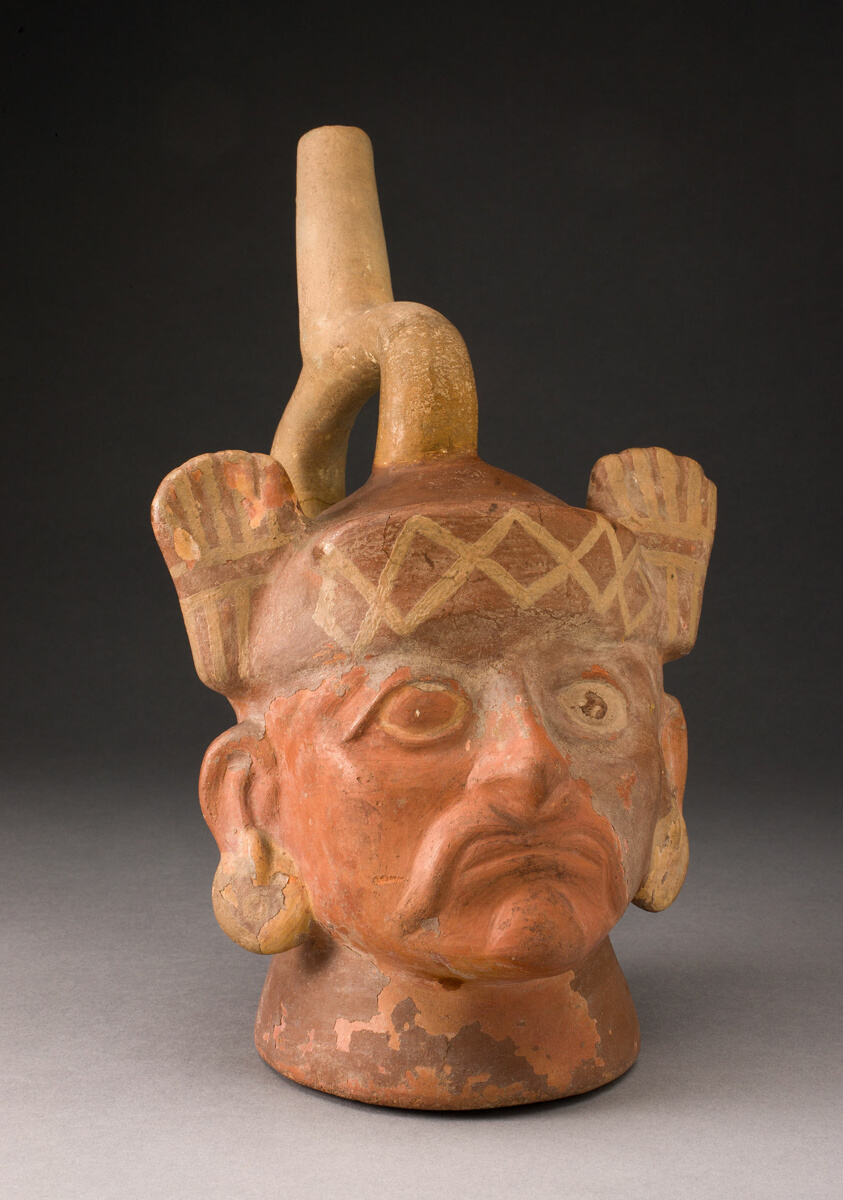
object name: Vessel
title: Portrait Vessel of a Ruler with Mustache and Feathered Headdress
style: moche, Arts of the Americas, andes, south american, andean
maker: Moche (Chimbote, Santa Valley, north coast, Peru)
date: 100 BCE–500 CE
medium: Ceramic and pigment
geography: Peruvian North Coast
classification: earthenware; ceramics; vessel; art of the americas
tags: people, portraits